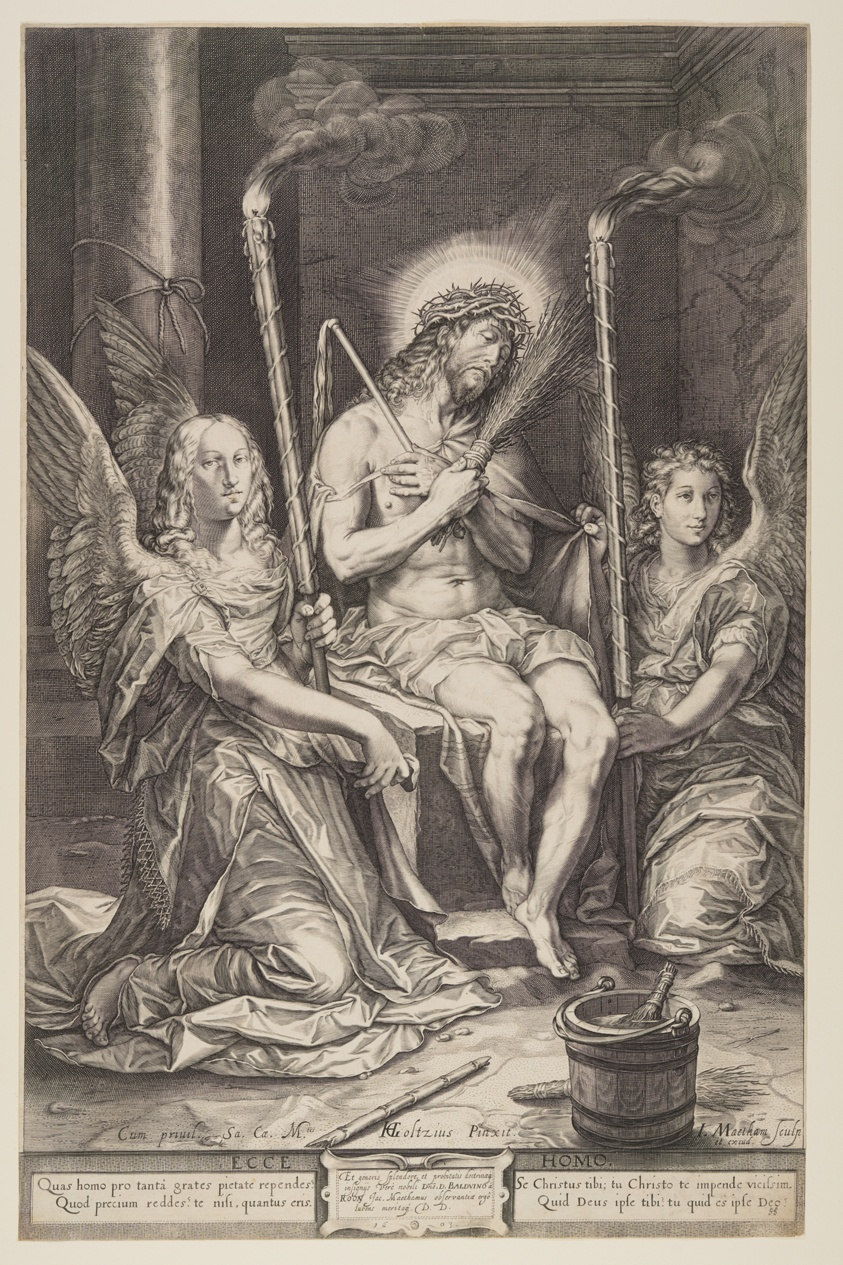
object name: Print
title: Christ on the Cold Stone with Two Angels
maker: Jacob Matham (Dutch, 1571–1631); after Hendrick Goltzius (Dutch, 1558–1617)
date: 1603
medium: Engraving on ivory laid paper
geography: Netherlands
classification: engraving; paper; print; prints and drawing